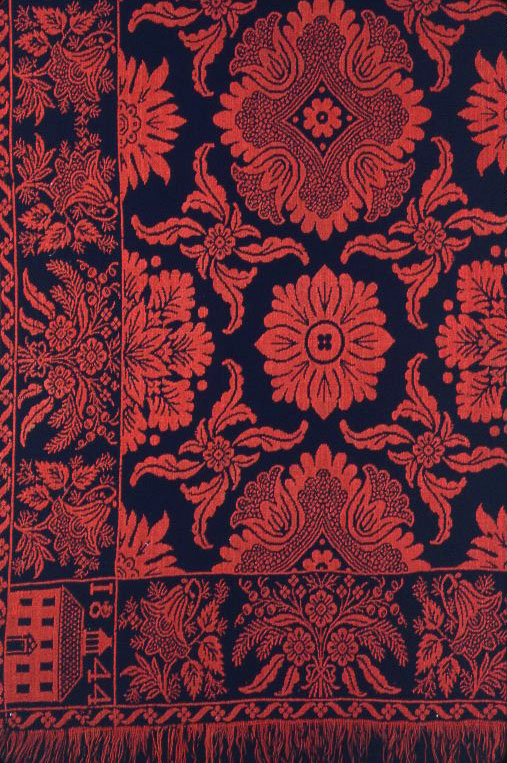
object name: Textile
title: Coverlet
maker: William Craig, Sr. (American, 1800–1880); United States, Indiana, Decatur County, Greensburg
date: 1844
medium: Cotton and wool, plain weave double cloth; woven on loom with Jacquard attachment; two loom widths joined; fringed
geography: Indiana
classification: textile; coverlet; weaving - coverlet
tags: coverlet